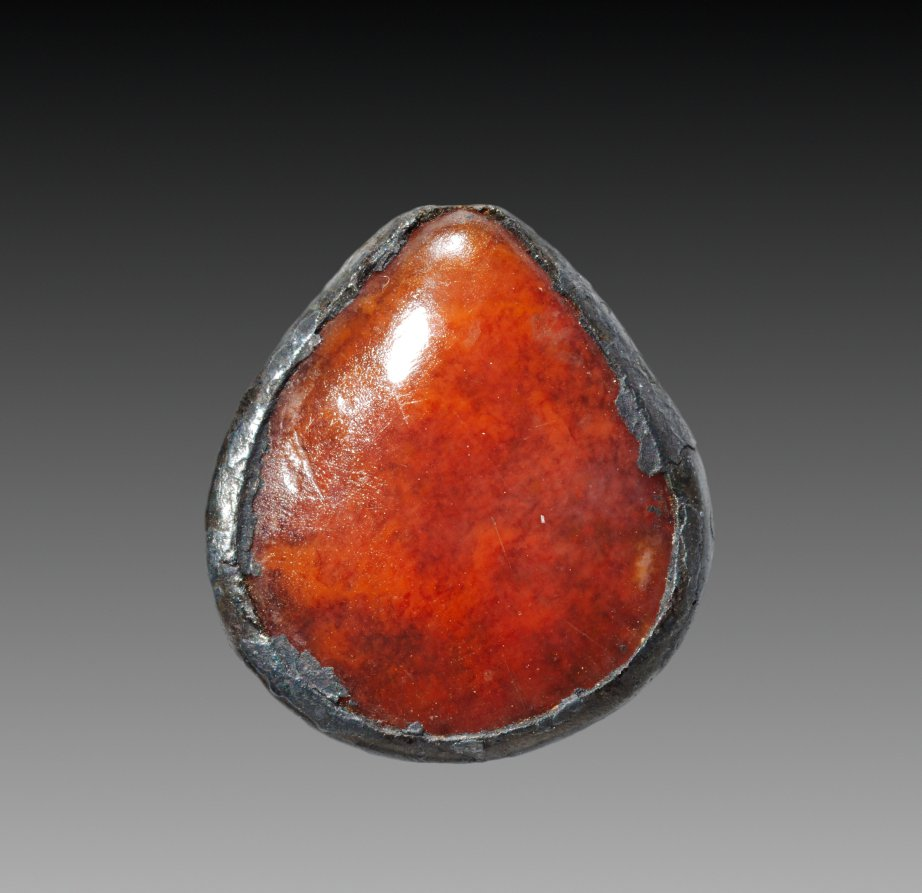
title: Oyster-Shell Pendant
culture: Egypt, Middle Kingdom (2040–1648 BCE), Dynasty 12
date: 1980–1801 BCE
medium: carnelian and silver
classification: Jewelry